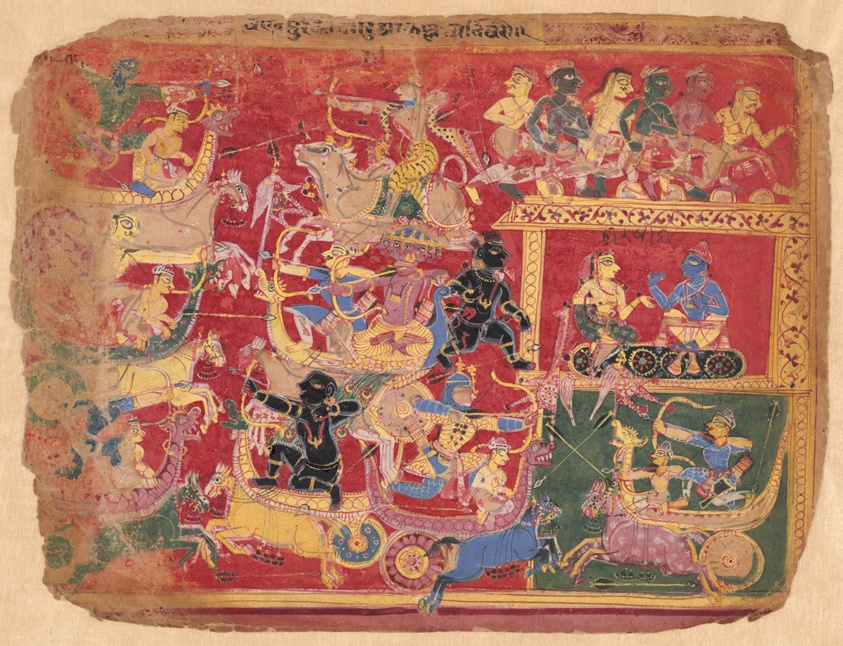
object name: Painting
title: Battle of the Forces of Krishna and Bana, from a copy of the Dispersed Bhagavat Purana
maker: India; Delhi-Agra region, possibly Mathura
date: c. 1520–1530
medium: Opaque watercolor on paper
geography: India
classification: calligraphy; book; asian art; painting